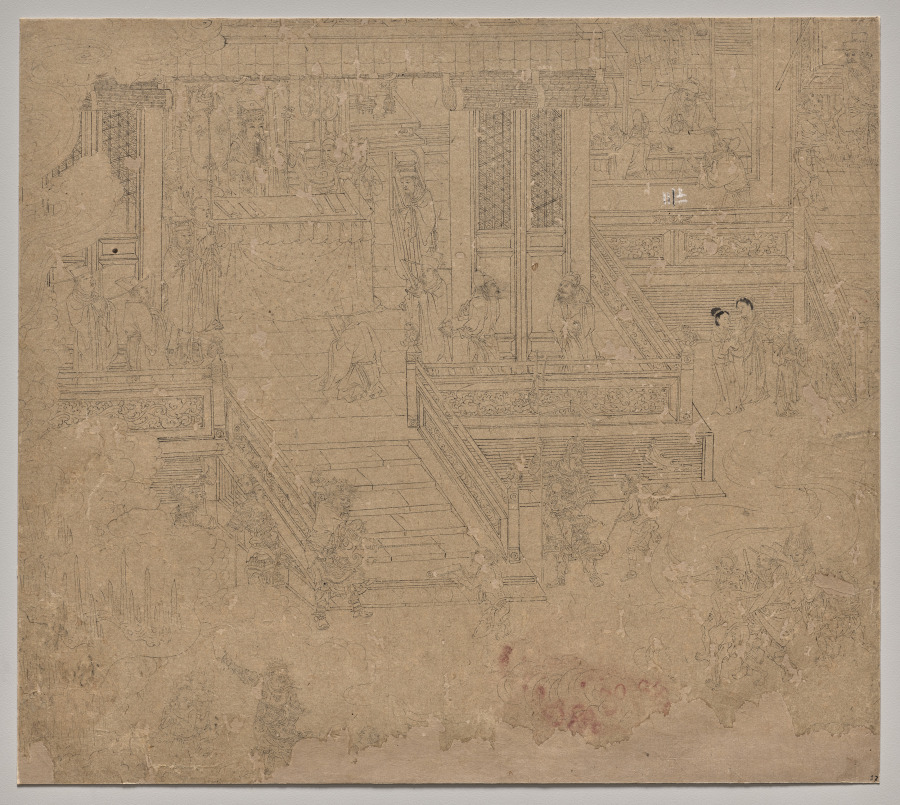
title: Album of Daoist and Buddhist Themes: Kings of Hells: Leaf 37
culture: China, Southern Song dynasty (1127-1279)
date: 1200s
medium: Album, ink on paper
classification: Painting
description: This extraordinary album has 50 paintings on a variety of religious subjects. They were likely created by several master craftsmen to share with studio apprentices as models for fulfilling commissions. The Jade Emperor and the Daoist pantheon make up the first 26 leaves. The next 14 leaves portray the Buddhist Ten Kings of Hell administering punishments to the dead. The third section, called “Clearing the Mountains,” features divine soldiers, led presumably by the deity Erlang Shen 二郎神, fighting undesirable creatures.